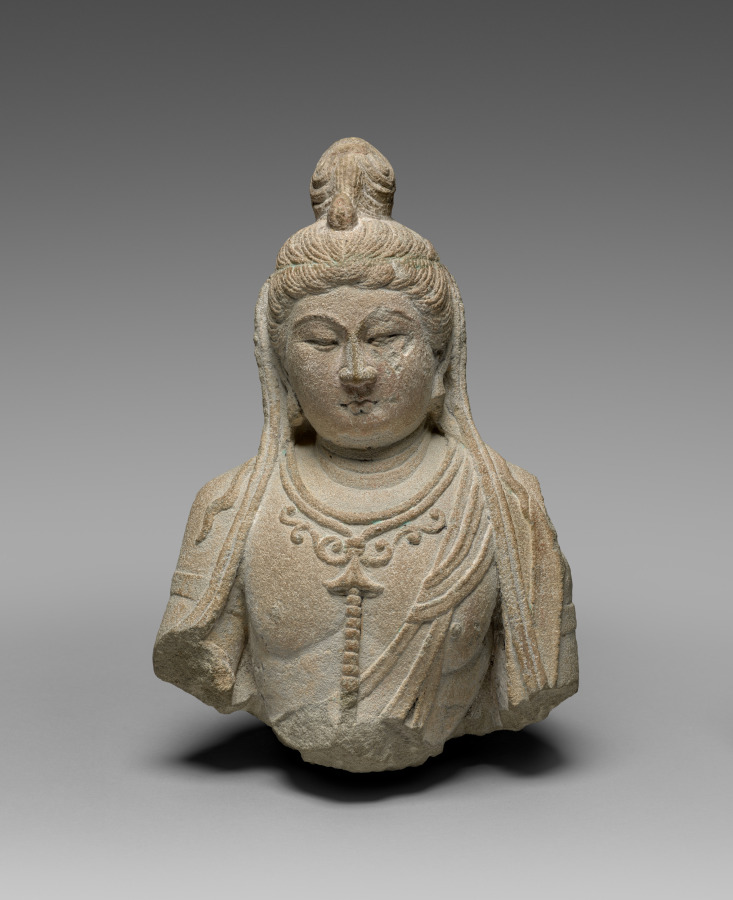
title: Bodhisattva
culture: China, Shanxi province, Taiyuan, Tianlongshan caves, Cave 6, Tang dynasty (618-907)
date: early 700s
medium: light gray limestone with traces of polychromy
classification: Sculpture